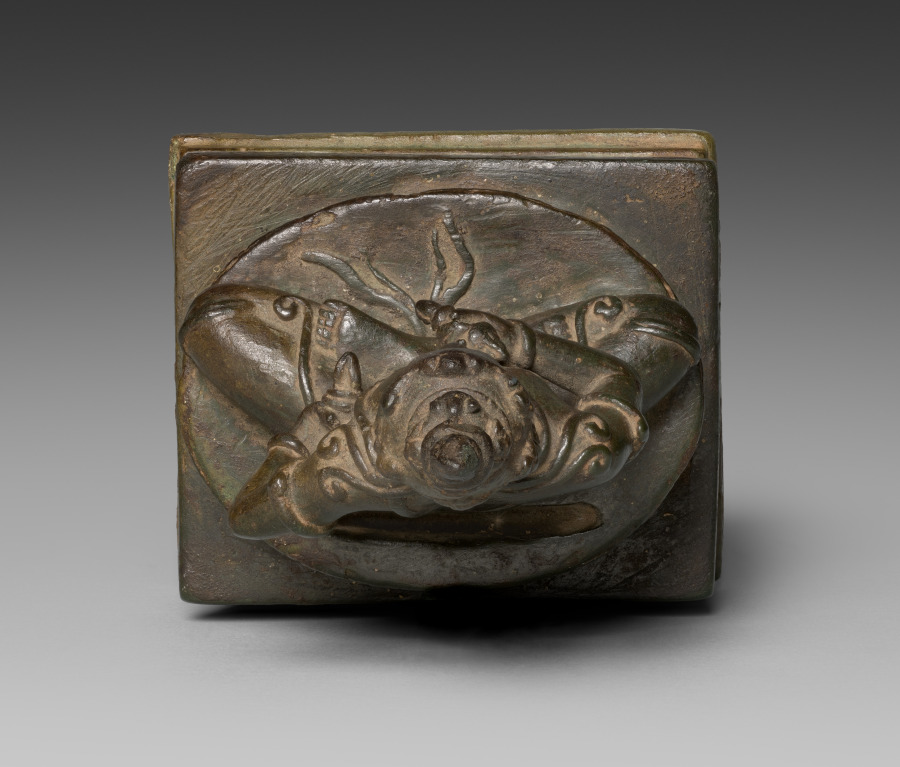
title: Vajrasattva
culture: Cambodia, style of Angkor Thom, 12th-13th century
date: 1100s–1200s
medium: bronze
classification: Sculpture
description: Vajrasattva is a Buddhist being of enlightenment who holds the vajra, or thunderbolt, in his right hand and a bell in his left. The vajra and bell are the basic implements used in tantric rituals that were popular under Jayavarman VII and practiced at Banteay Chhmar. Tantra is a form of Buddhism that makes use of rituals and mantras to aid practitioners in reaching their goals quickly, as though with the speed of lightning. Tantric texts and rituals were used frequently in Cambodia, from the 900s onward, but they were especially prominent under Jayavarman VII. This form of Buddhism appears to have been supplanted by other forms after the 1400s. Small bronze images of Vajrasattva may have been brought out from a temple treasury during the performance of Buddhist rituals that followed the instructions in a Sanskrit text, brought to Cambodia from India, called the Hevajra-tantra. In that text Vajrasattva manifests at key moments in the rituals.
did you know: From the back of the crown hang cords, which drape over the shoulders. The same type of cords hang from the back of the belt, coiling over the legs symmetrically on either side.